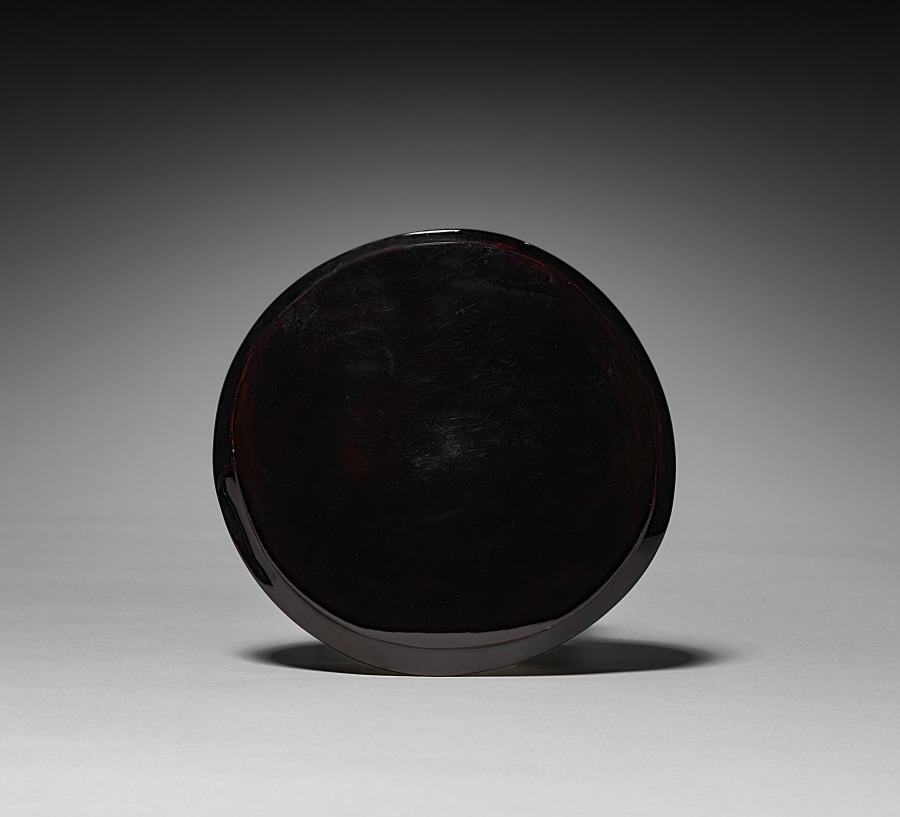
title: Water Container (Mizusashi) with Riverscape (lid)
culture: Japan, Momoyama period (1573-1615) to Edo period (1615-1858)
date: late 1500s–early 1600s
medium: Black lacquer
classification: Ceramic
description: Mizusashi are jars used to hold water for the preparation of tea at tea gatherings. This one was produced in the Mino area of present-day Gifu prefecture in central Japan, and is considered one of the finest of its type in existence, based on the complex aesthetic sensibilities developed around the tea ceremony in Japan. It is called a “picture Shino” (e-shino) mizusashi, as it has an abstracted design said to resemble an ink painting of reeds along a river bank and small boats in a river on one side, and a geometric pattern on the other. With its irregular shape and thick, luminous glaze, it is of a variety favored by eminent tea masters of the Momoyama period.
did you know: The water this container held during a tea ceremony was used to fill the kama, or iron pot in which the water is heated.